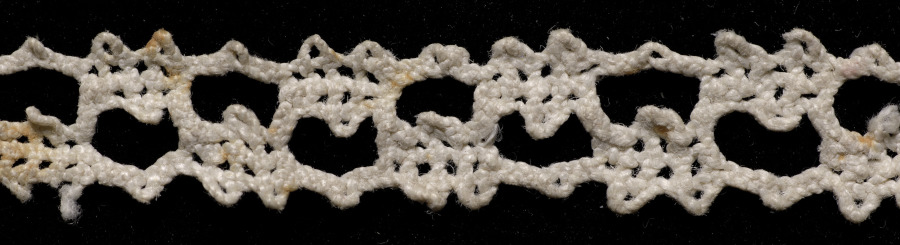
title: Lace Insertion (no selvage)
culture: Italy, Venice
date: 1540–60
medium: Bobbin lace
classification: Lace